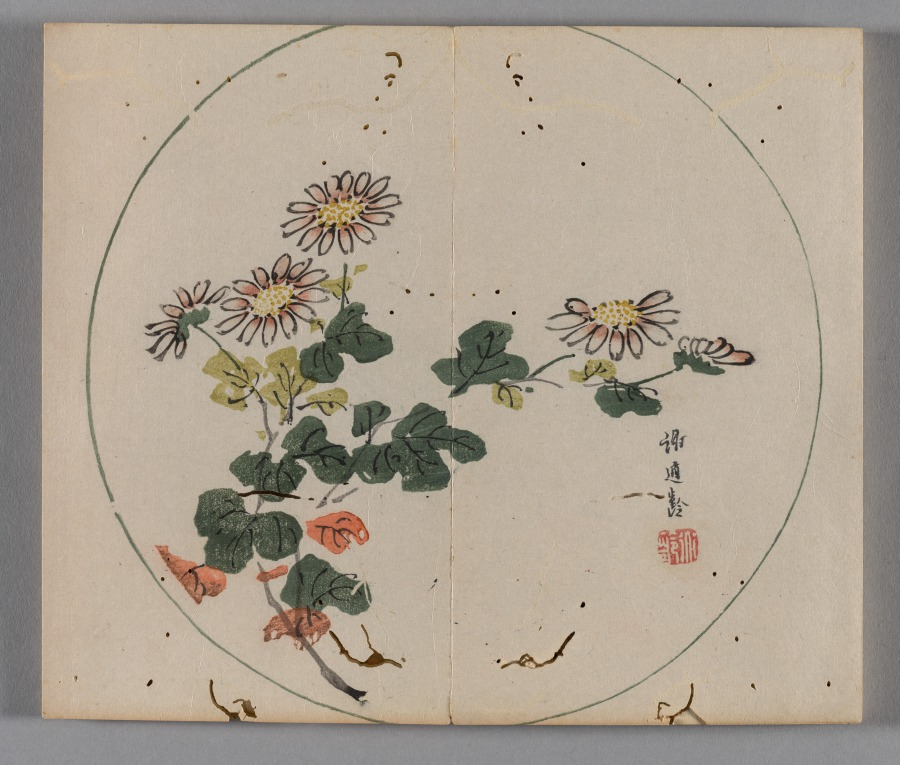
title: Ten Bamboo Studio Collection of Calligraphy and Painting: Round Fans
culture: China, Qing dynasty (1644-1911)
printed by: Hu Zhengyan (Chinese, c. 1584–1674)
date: 1633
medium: Woodblock-printed book; ink and colors on paper; first edition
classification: Print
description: Color printing reached a level of perfection in the early 1600s, as seen in this Ten Bamboo Studio Collection of Calligraphy and Painting and the Mustard Seed Garden Manual of Painting (printed 1679 and 1701). The painterly quality, precision in registering (aligning) the woodblocks, and harmonious colors made them the most successful color print editions in Chinese history. Both editions were printed and compiled in Nanjing, spread nationwide, and had a great impact on the arts in Japan and Korea.